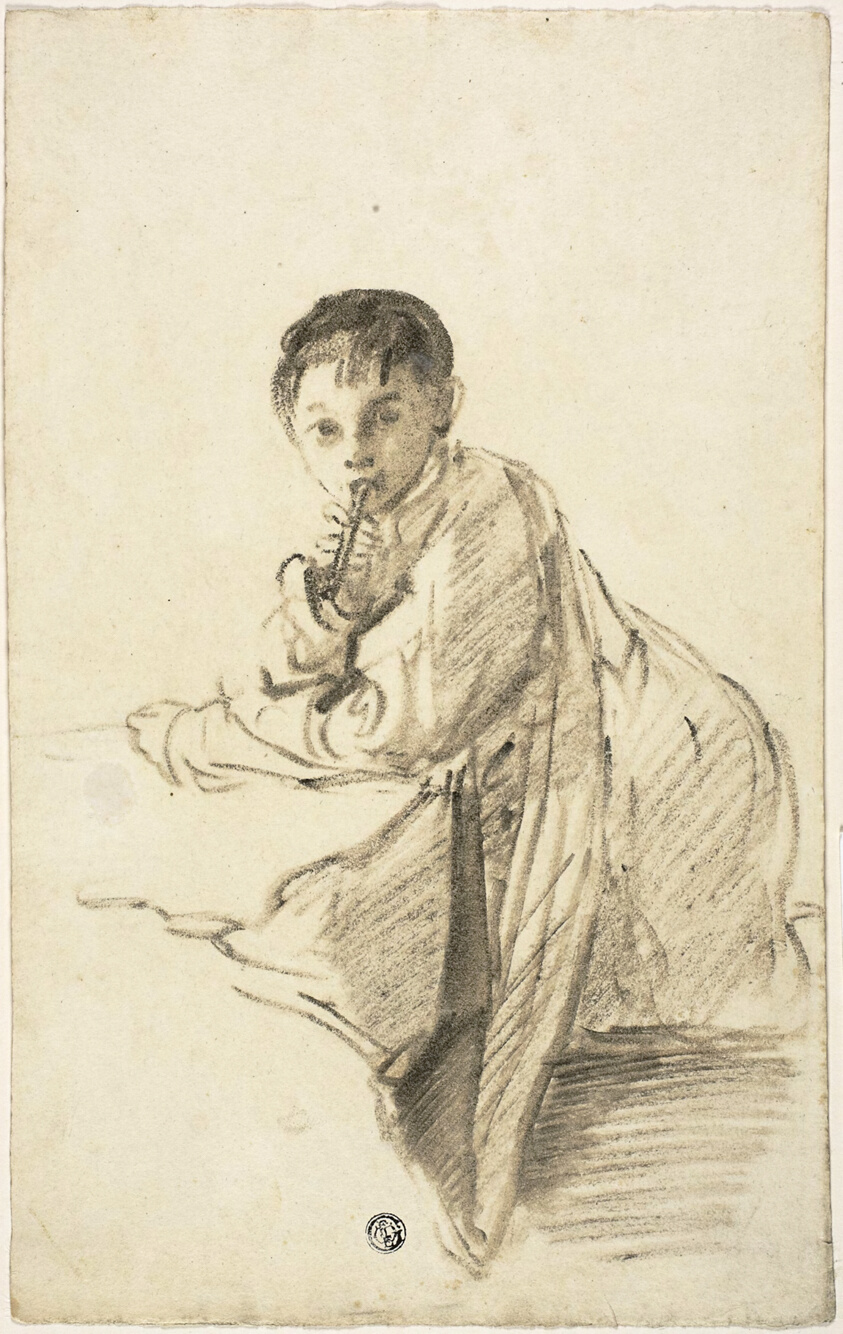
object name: Drawing and Watercolor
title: Child with Musical Instrument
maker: Attributed to Thomas Barker (English, 1769-1847); or Thomas Jones Barker (English, 1815-1882)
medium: Brown-black crayon on cream wove paper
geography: England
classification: chalk; drawings (visual works); prints and drawing